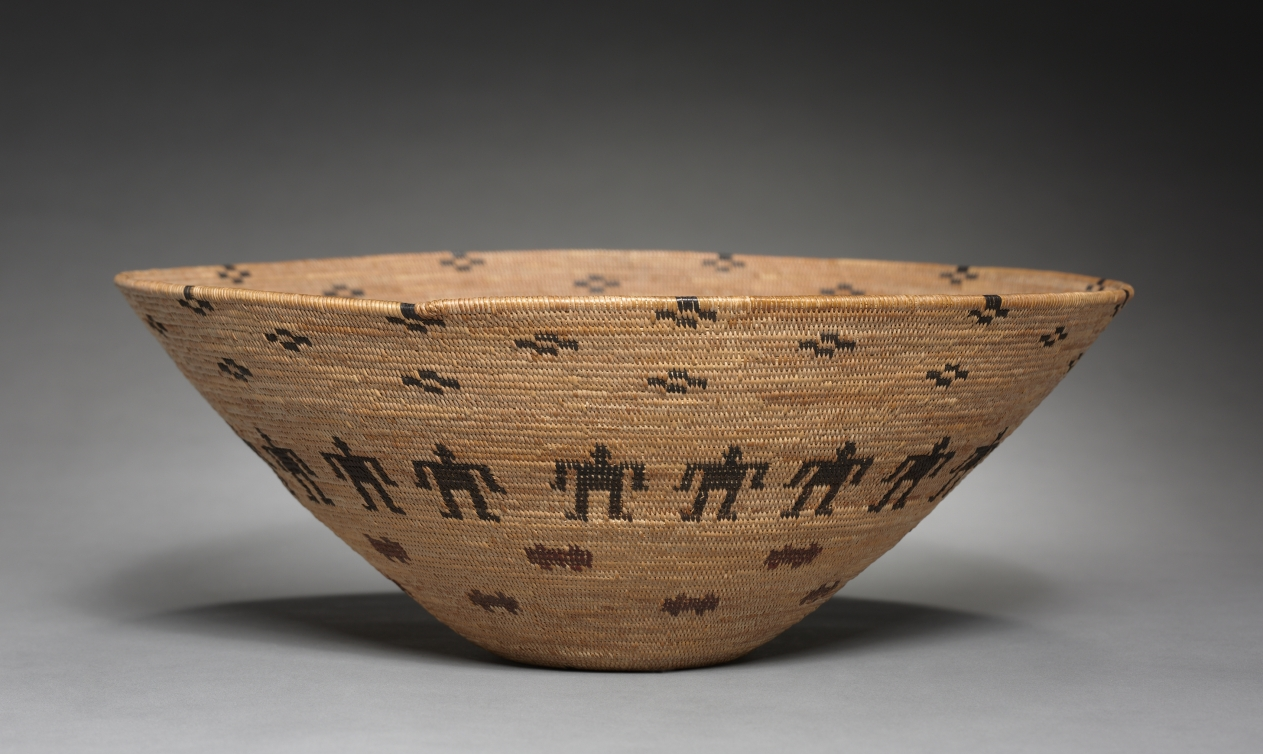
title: Bowl Basket (Unfinished)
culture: California, Yokuts, late 19th- early 20th century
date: 1895–1900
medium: Redbud, sedge, bracken fern; coiled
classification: Basketry